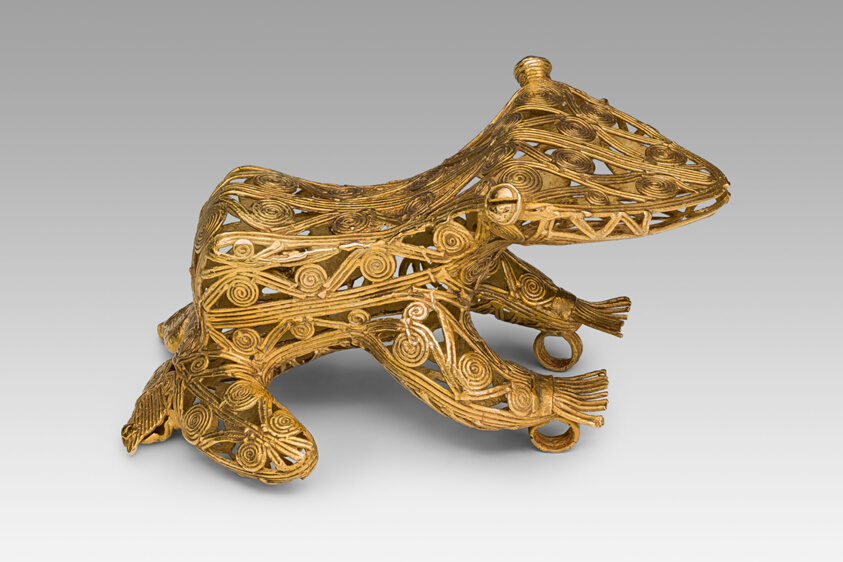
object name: Costume and Accessories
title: Filagree Pendant in the Form of a Frog or Toad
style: coclé, Pre-Columbian, americas, venado beach, lower central america, Arts of the Americas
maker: Coclé (Venado Beach, Coclé province, Panama)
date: 500–1000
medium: Cast gold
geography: Venado Beach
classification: jewelry; pendant (jewelry); metal; art of the americas; costume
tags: frog, animals